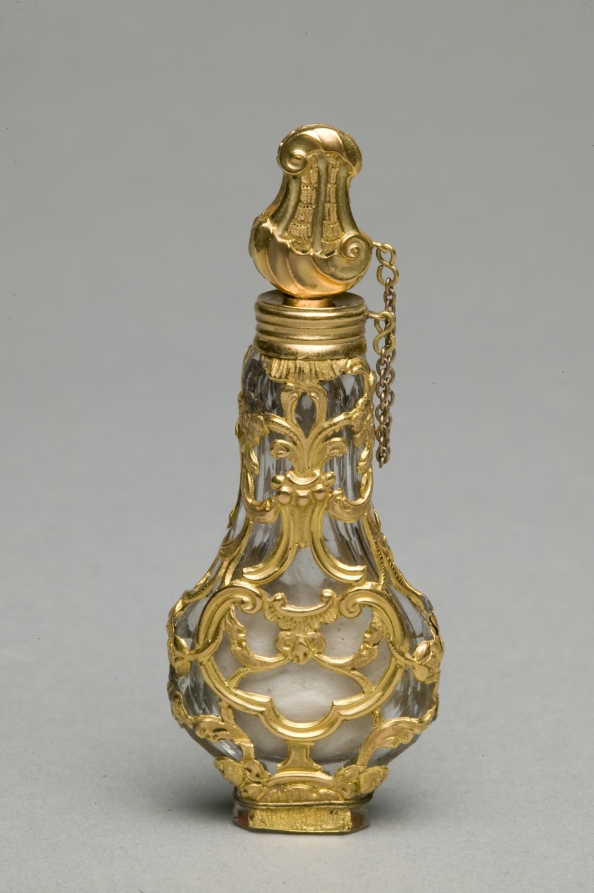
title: Scent Bottle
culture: France, 18th century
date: c. 1775 (?)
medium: glass mounted in gold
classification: Miscellaneous